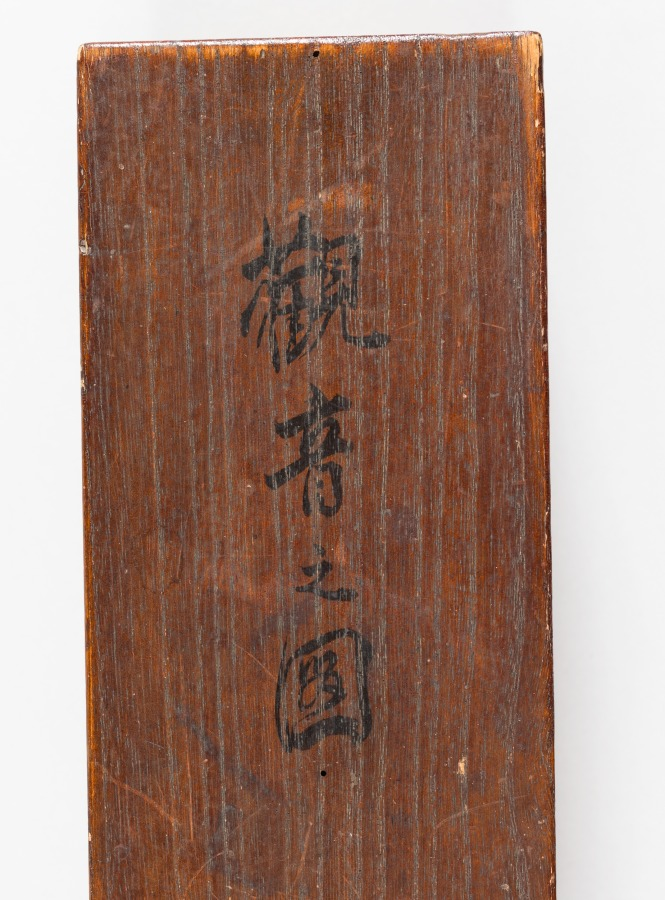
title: White-Robed Guanyin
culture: China, Yuan dynasty (1271-1368)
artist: Jueji Yongzhong (Chinese, active around 1300)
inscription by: Zhongfeng Mingben (Chinese, 1263–1323)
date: late 1200s–early 1300s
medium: hanging scroll; ink on paper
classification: Painting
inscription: Artist's signature: Huanzhu Yongzhong. Inscription by Zhongfeng Mingben: The right thinking [Samkalpa] is embodied within His deep meditation on the Buddha [naga-samadhi]. Retaining not even one single object of thought, A perfect harmony was wonderfully achieved. In the endless time and space, His all-embracing compassion prevails. [signed] Mingben of Huanzhu paying his respects.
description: Guanyin, the bodhisattva of infinite compassion (Avalokiteshvara, in Sanskrit), reveals himself in many forms. According to Buddhist belief, one such manifestation is the white-robed Guanyin sitting on a rock on the island of Putuo (Potalaka, in Sanskrit), located along the coast not far from Ningbo, in Zhejiang Province, China. Here, the figure was swiftly drawn in only a few ink lines. The inscription above is by Zhongfeng Mingben, perhaps the most widely respected and influential Chan (Zen in Japanese) master in the Yuan dynasty. The artist’s signature is a single line below on the left: Huanzhu Yongzhong.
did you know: The CMA collection includes a drawing by a Japanese priest, CMA 1978.47.2, inspired by this composition.